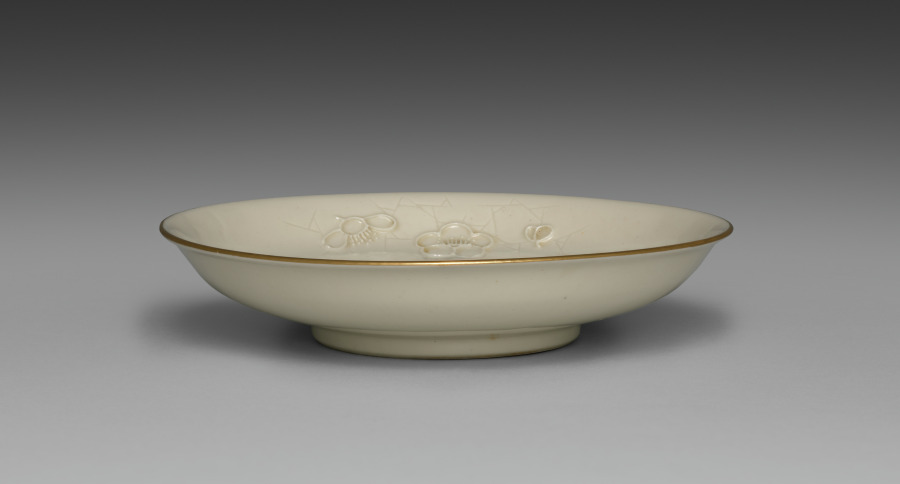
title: Medium-sized Dish from Dining Set with Plum Blossoms and Cracked-Ice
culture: Japan, Meiji period (1868–1912)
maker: Seifū Yohei II (Japanese, 1844–1878)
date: c. 1875–78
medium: Porcelain with molded designs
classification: Ceramic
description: Each item in this set has a delicate low-relief design of flowering plum branches over scattered, intersecting lines meant to resemble the cracked-ice surface of a frozen body of water and is signed on the base in gold pigment. While Yohei II produced many fine works in underglaze blue, like those produced by Kiyomizu Shichibei, he also made works in quite different styles later in his career, from the early 1870 s. In 1873, he was appointed purveyor to the Industrial Center of Kyoto Prefecture, a designation associated with Kyoto’s efforts to reach an international market through the port of Kobe; and from 1875 until his death, he was involved in national-level projects to present Japanese ceramics across the world. It was during this period that Yohei III was apprenticed to Yohei II, and it has been suggested that this set may in fact be an early example of Yohei III’s work, which he signed with his teacher’s name. Decorated with flowers resembling Japanese textile motifs, the set calls to mind the design of Yohei II’s pair of vases with plum blossoms in the Victoria and Albert Museum. Here, the elaborate trees created for a formal public exhibition setting have been translated into the approachable blossoms of the genteel domestic environment. While the designs are consistent across the pieces, each raised flower petal and pistil and each incised line in the ice was done by hand, so the cups, bowls, and dishes are similar yet unique. The bottoms of two boxes once identified the set’s owner, but the information has been deliberately obscured with black ink. However, inscriptions still visible appear to indicate two occasions, once at the end of July 1886 , and once again in June 1916 , when parts of the set were requested from Hokura in Niigata Prefecture. The location corresponds to a neighborhood in the present-day city of Jōetsu. The surname Tsuji 辻 also appears on a paper tag affixed to one of the box cloths. Future research may possibly reveal more about their provenance. A vase by Yohei III in a private collection combines the formal grandeur of the Yohei II vases in the Victoria and Albert Museum with the gentler design of this dining set, placing flowering plum trees against soft, scalloped-edge clouds resembling those in golden screens.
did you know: The dining wares have a creamy white coloration that the four boxes containing them identify as Korean in style.